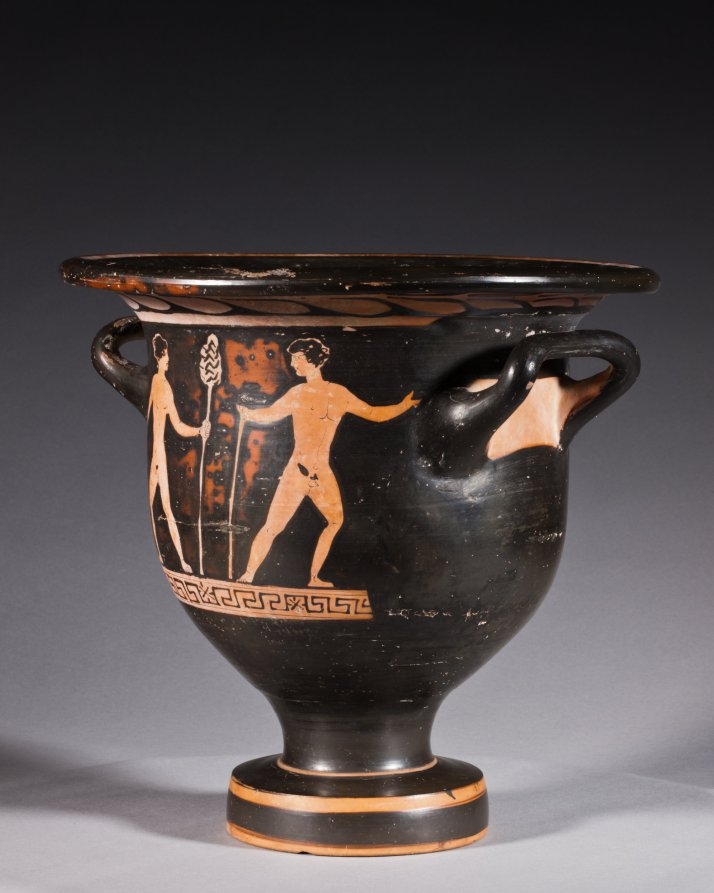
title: Red-Figure Bell Krater (Mixing Vessel): Aphrodite and Eros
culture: South Italian, Apulian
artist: attributed to Graz Painter (South Italian, Apulian, active c. 380–360 BCE)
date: c. 370–360 BCE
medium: ceramic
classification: Ceramic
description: This small mixing vessel shows a finely dressed woman seated on a chest and holding up a mirror to admire herself. Before her stands Eros, the winged god of love, holding a ribbon or sash. Behind the woman stands a pillar with the inscription ΑΦΡΟΔΙΤΗ, or APHRODITE, the goddess of love. Such labels are rare on vases, and scholars debate whether this names the woman shown as Aphrodite herself, with her son Eros, or a bride envisioning herself as Aphrodite, just before her wedding.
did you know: The dancing nude youths on the reverse are unusual; typically they would be standing and draped.